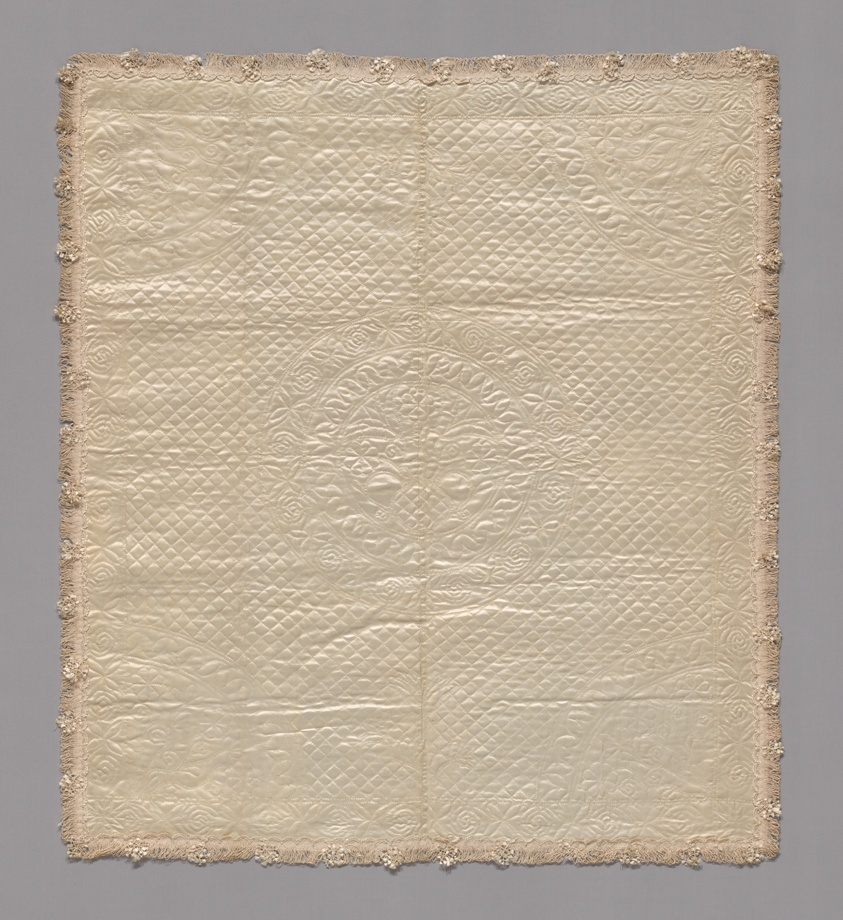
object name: Textile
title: Christening Cover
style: american colonial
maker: Possibly made by or for Mary Philipse Morris (1730–1825); United States, New York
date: c. 1758 or earlier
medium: Silk, warp-float faced satin weave; quilted; edged with warp-faced plain weave woven tape and fringe with wrapped tassels; backed with silk, plain weave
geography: New York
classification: textile; needlework - quilt